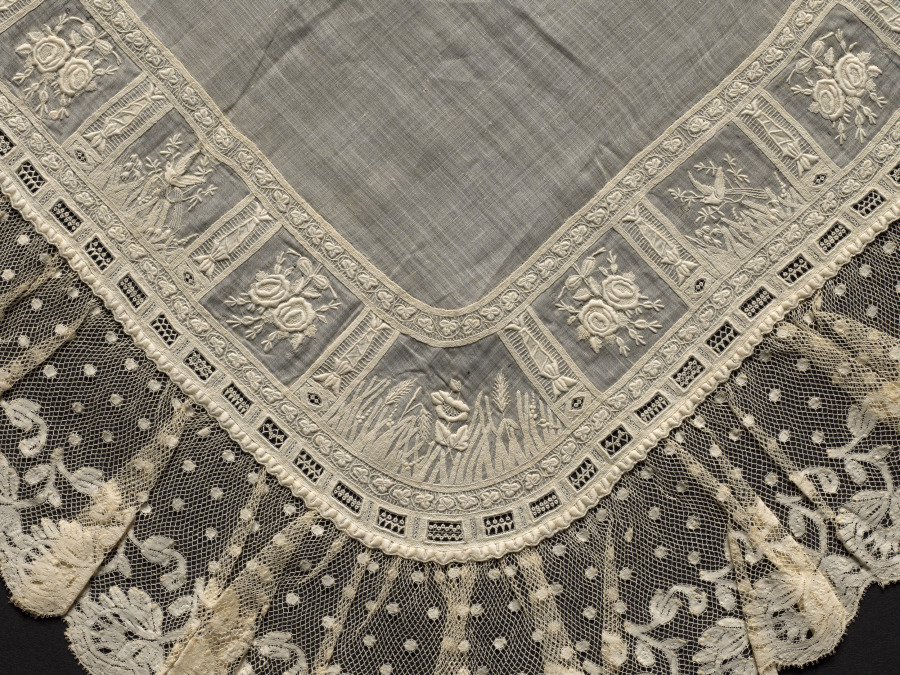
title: Lace Handkerchief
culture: Switzerland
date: 1800–1820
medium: Plain weave linen center with bobbin lace (Valenciennes lace) edging and embroidery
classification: Embroidery